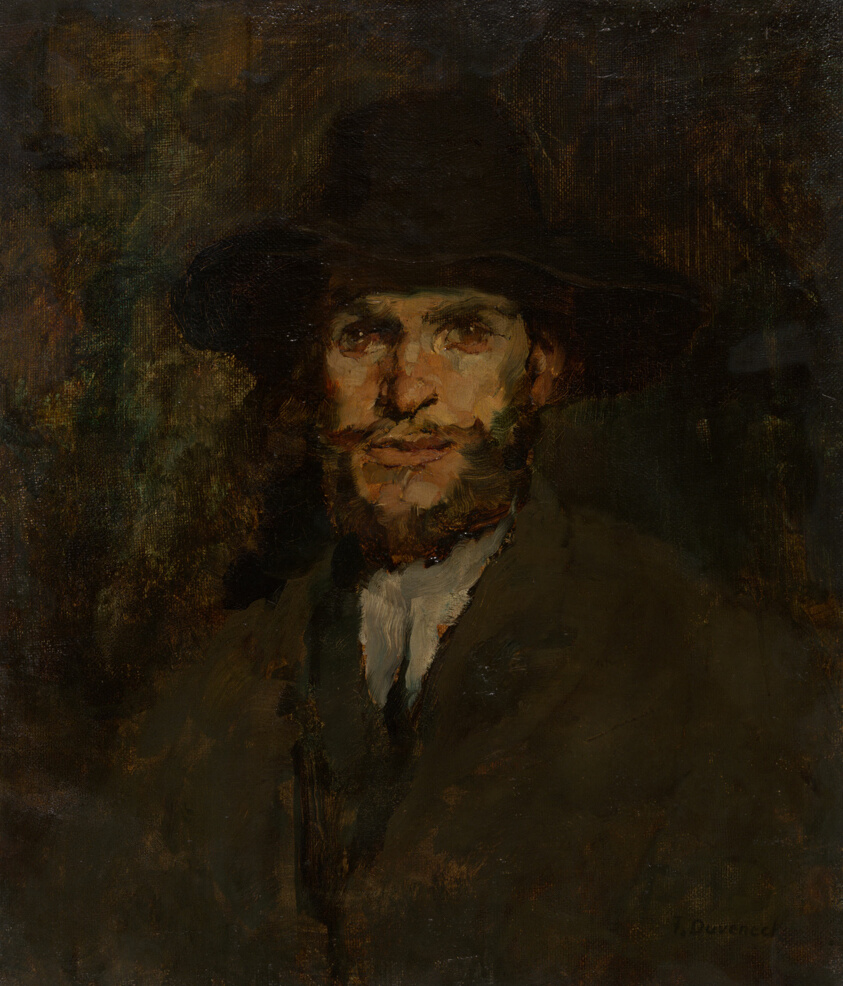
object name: Painting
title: J. Frank Currier (1843–1909)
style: Realism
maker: Frank Duveneck (American, 1848–1919)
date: 1876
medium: Oil on canvas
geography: United States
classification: painting; american arts